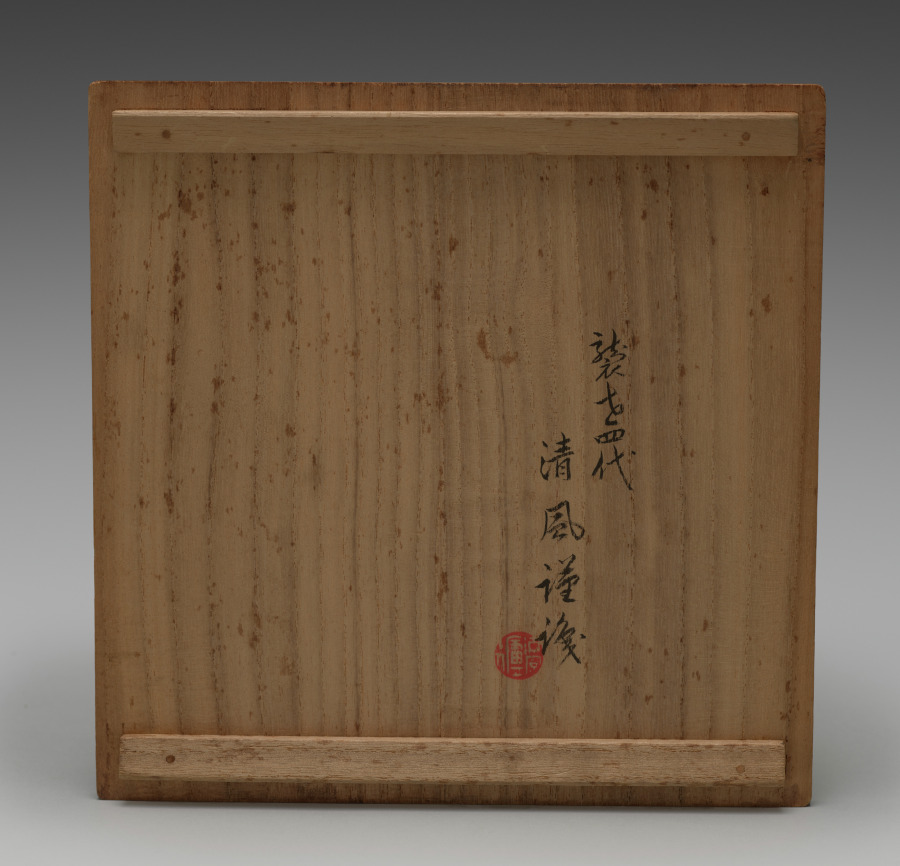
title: Bowl with Pines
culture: Japan, Meiji period (1868–1912)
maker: Seifū Yohei III (Japanese, 1851–1914)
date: 1893–1914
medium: porcelain with underglaze blue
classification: Ceramic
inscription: Inscription by Seifū Yohei IV on the box states that the bowl is the work of Yohei III.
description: The bowl has slightly more detailed surface designs painted in blue under the glaze than some other Yohei III's other teaware, like the Water Cooler with Pines, CMA 2022.163. The three pines, with two, three, and four racks of boughs respectively, have more angular rather than curved trunks, with clearly articulated bark.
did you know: The box for the bowl carries an attestation by Yohei IV that it is the work of his predecessor.